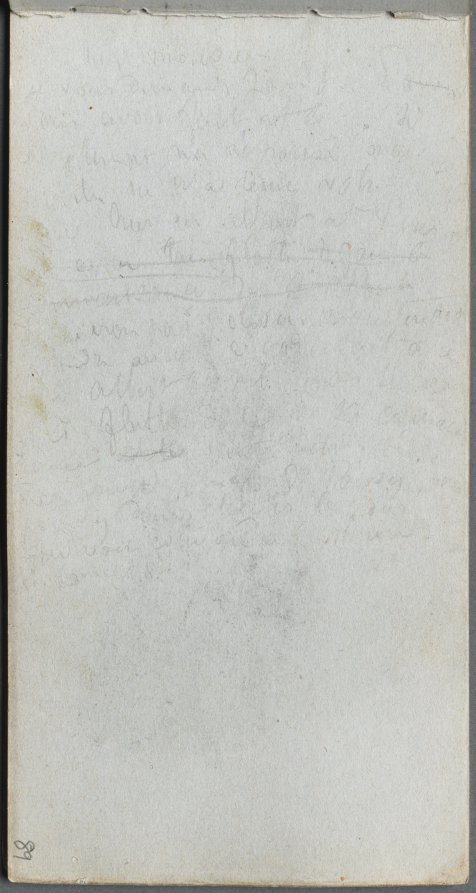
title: Sketchbook, page 89: Notes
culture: France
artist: Ernest Meissonier (French, 1815–1891)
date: c. 1860s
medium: graphite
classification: Bound Volume